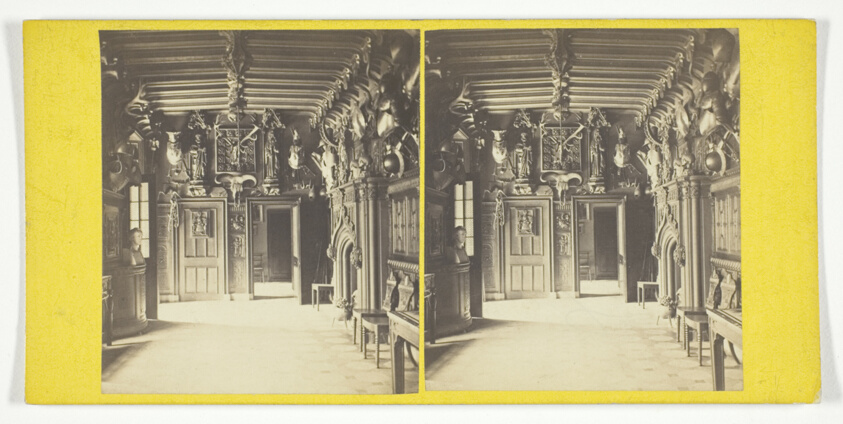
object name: Photograph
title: Abbotsford - The Hall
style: 19th century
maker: G. W. Wilson (Scottish, 1823–1893)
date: Mid 19th century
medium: Albumen print, stereo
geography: Scotland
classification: photography; photograph